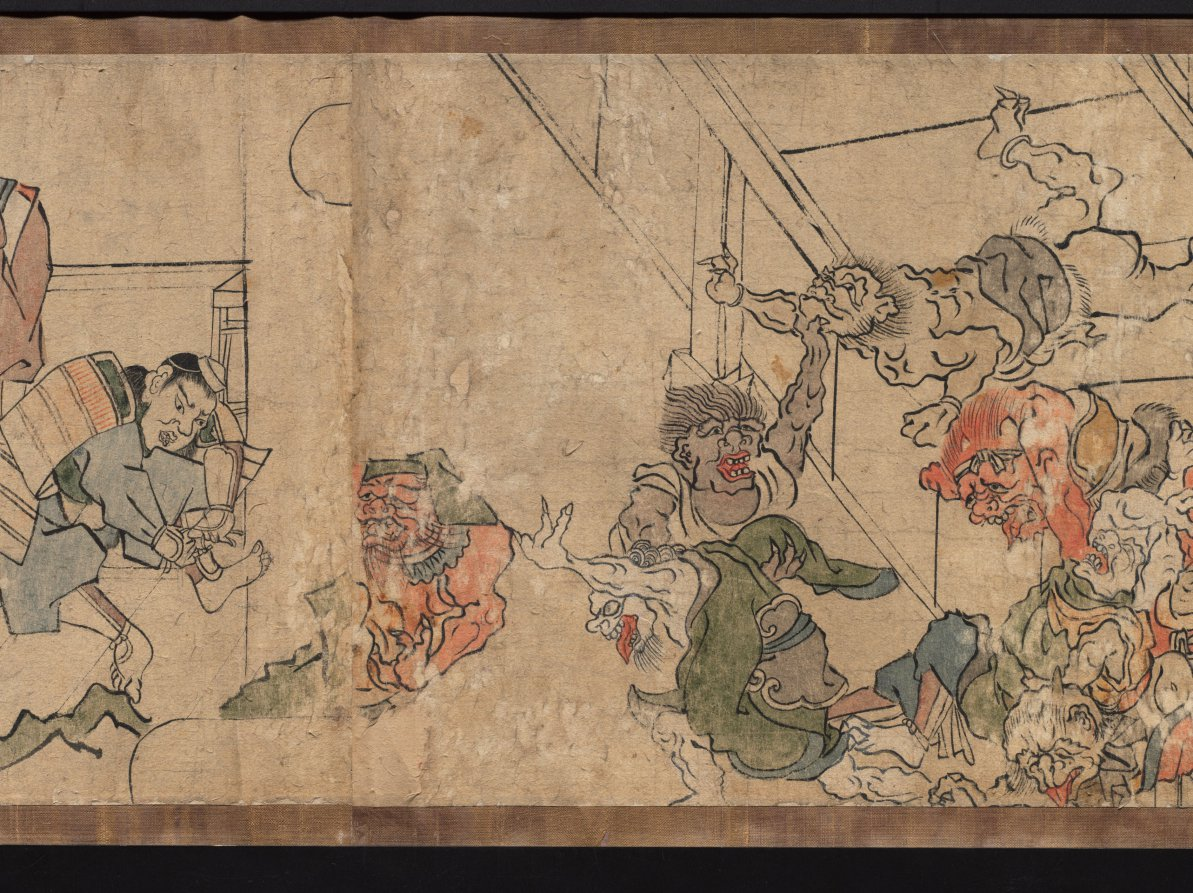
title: Oeyama Engi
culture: Japan, Edo period (1615–1868)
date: 1615–1868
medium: one of a pair of handscrolls; ink and color on paper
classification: Painting